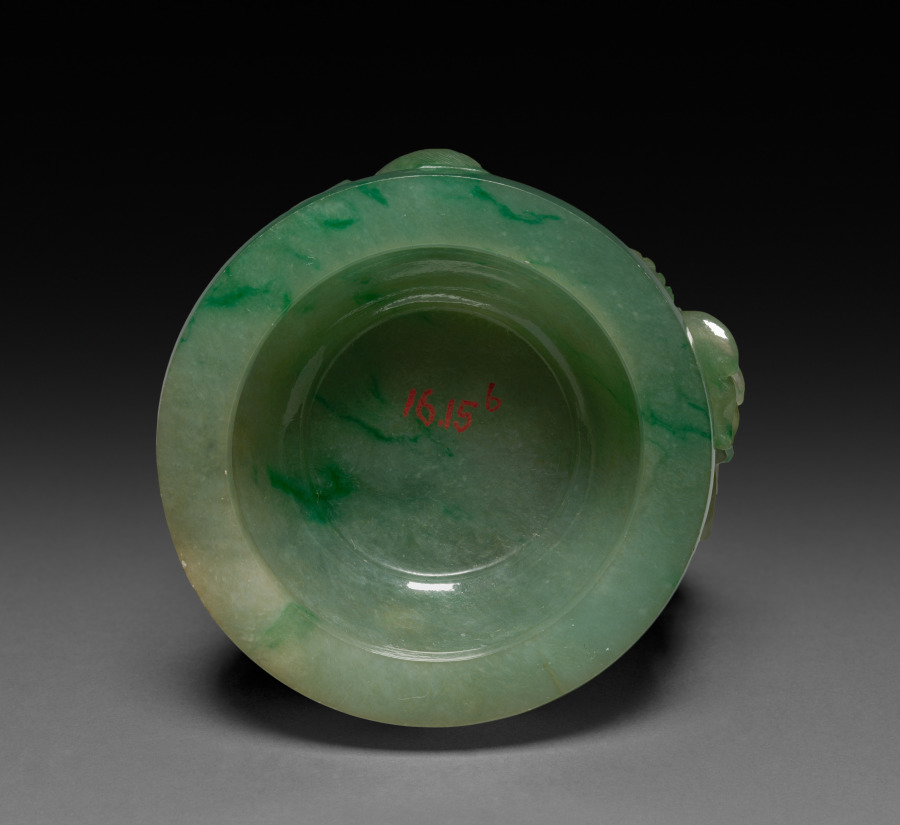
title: Tripod Vase: Ting (cover)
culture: China, Qing dynasty (1644-1911)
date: 1644–1911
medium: jade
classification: Jade